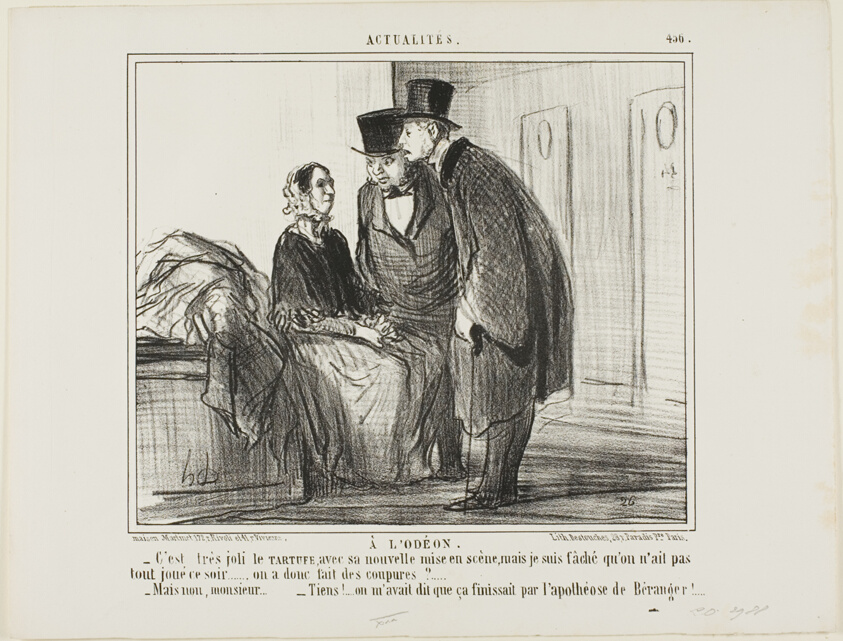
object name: Print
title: At the Odeon Theater. “- The new production of TARTUFFE seems to be very good, but I am furious that there is no performance tonight… there have been restrictions, I presume?… - But no, Monsieur… - Well, I have been warned that it would end with the apotheosis of Béranger!,” plate 456 from Actualités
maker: Honoré Victorin Daumier; French, 1808-1879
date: 1857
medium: Lithograph in black on white wove paper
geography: France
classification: lithograph; print; prints and drawing